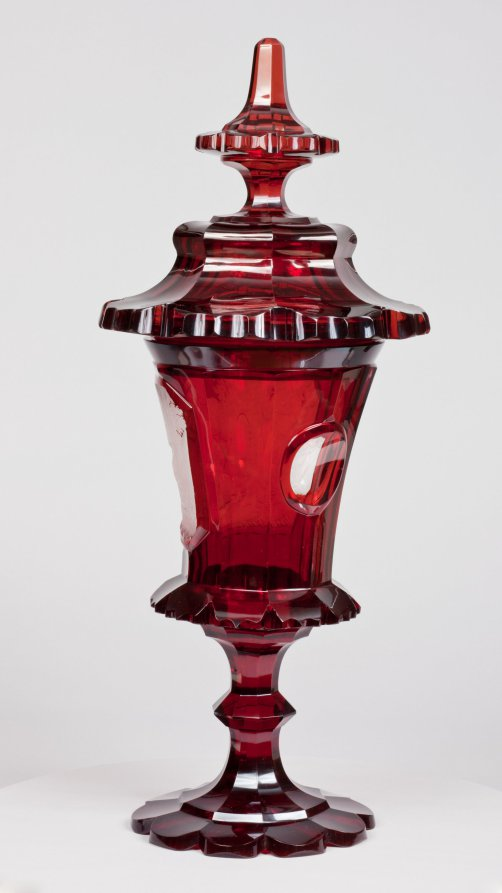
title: Covered Cup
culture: Bohemia, 19th century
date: mid-1800s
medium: ruby glass with engraved decoration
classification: Glass